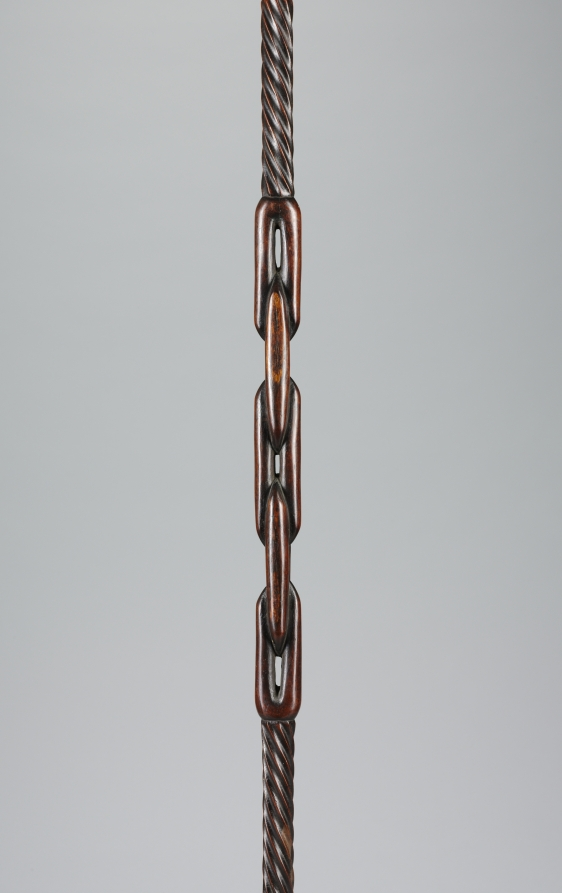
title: Prestige Staff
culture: Africa, Southern Africa, South Africa, Tsonga-style or Zulu-style maker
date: 1800s–1900s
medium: Wood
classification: Implements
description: The primary use of long staffs like this was purely practical; they served as walking companions when their pastoralist-owners covered long distances accompanying their cattle in search of new pastures. The tall height of this staff indicates the elevated status or special function of the man who owned it. Carved from one piece of wood, its spherical knob finial and the geometric designs incorporated into its shaft decoration—consisting of spiraling segments and chain links—demonstrate its maker’s superior skills.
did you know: Tsonga and Zulu staffs all have strong symbolic associations and value. They visually connect the identity of their owners with that of their ancestors and with that of the community to which they belong.